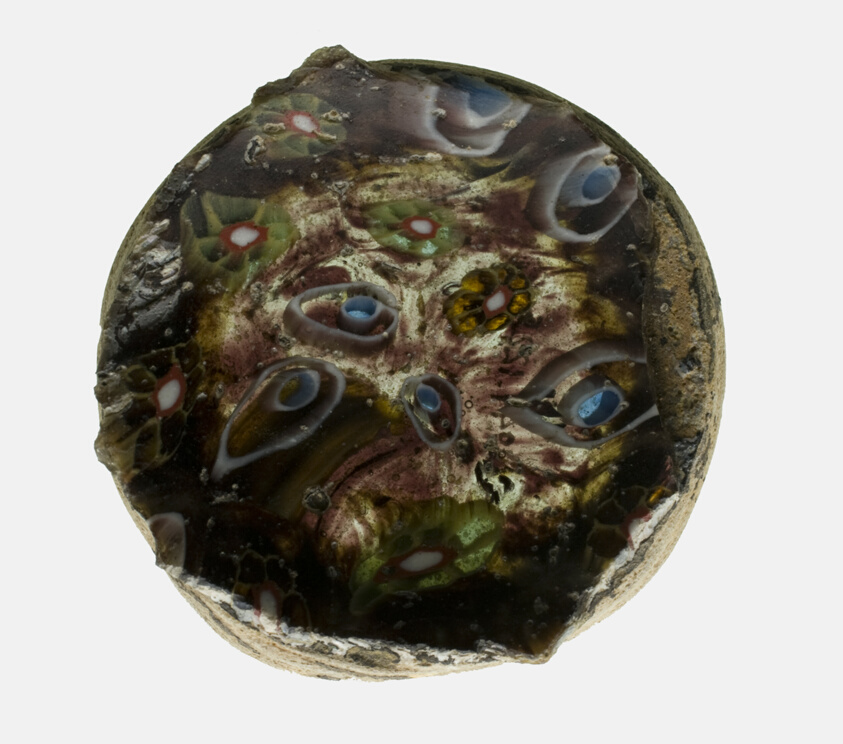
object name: Decorative Arts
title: Fragment of a Cup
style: ancient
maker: Roman or Eastern Mediterranean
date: 1st century BCE–1st century CE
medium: Glass, mosaic technique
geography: Roman Empire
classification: fragment; decorative arts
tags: decoration